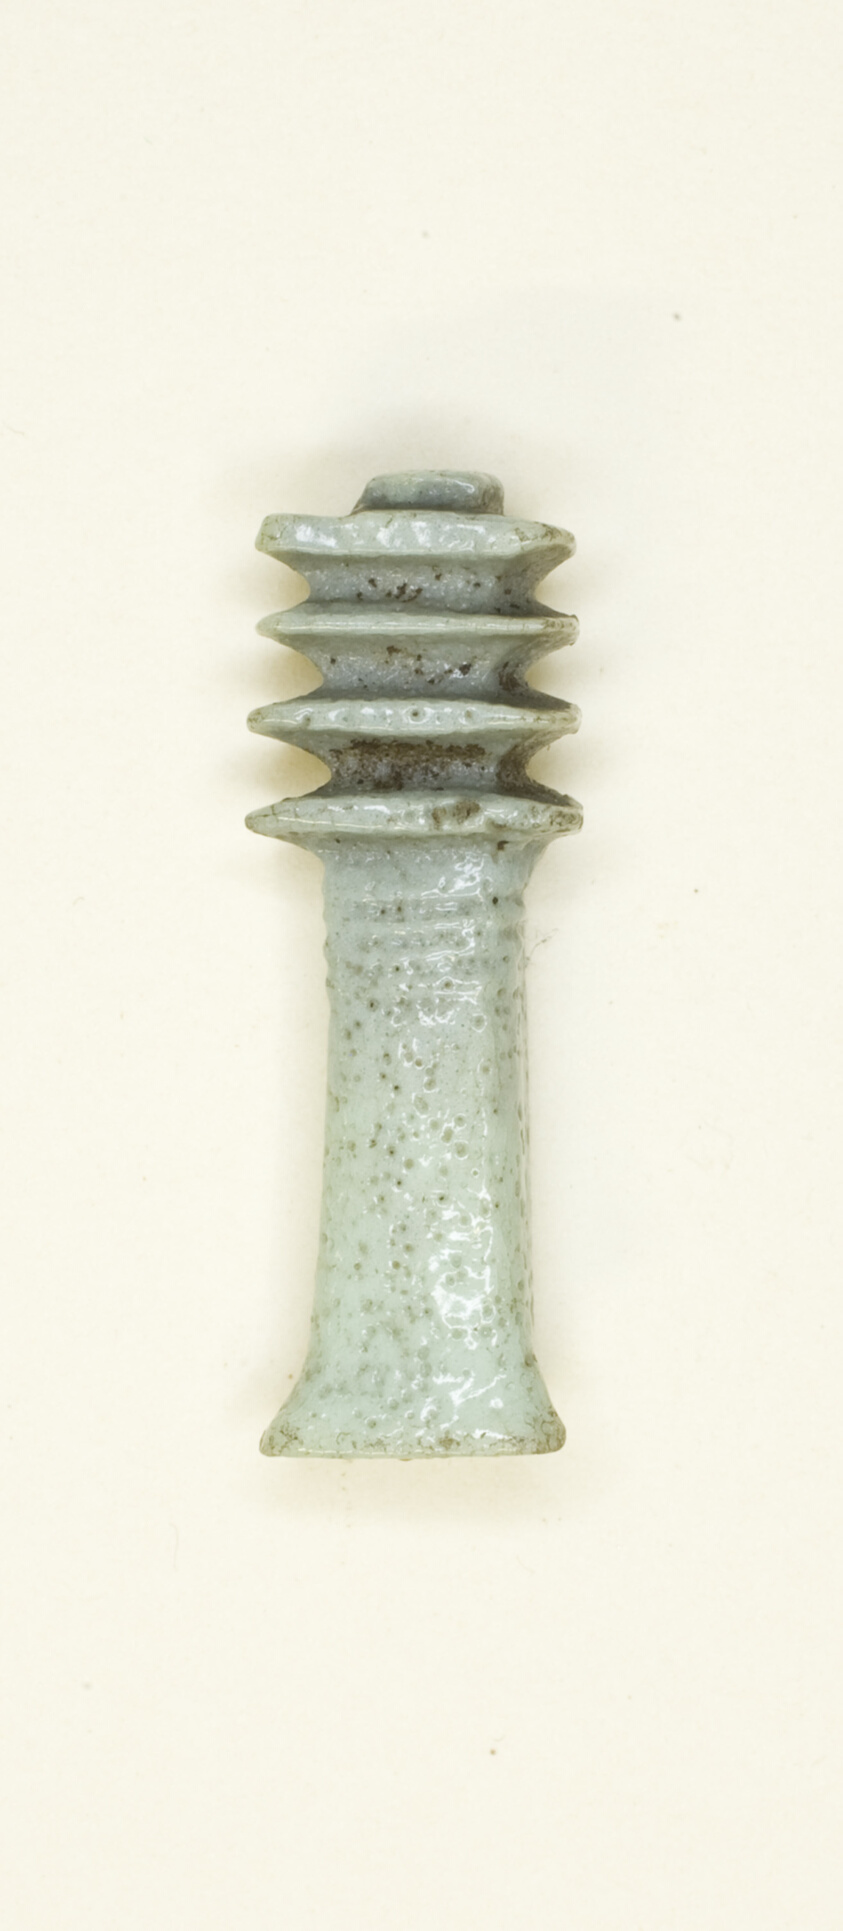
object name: Costume and Accessories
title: Amulet of a Djed Pillar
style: egyptian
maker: Egyptian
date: Late Period, Dynasties 26–31 (664–332 BCE)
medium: Faience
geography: Egypt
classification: amulet; jewelry; ceramics; ancient art; costume; faïence (composite material)